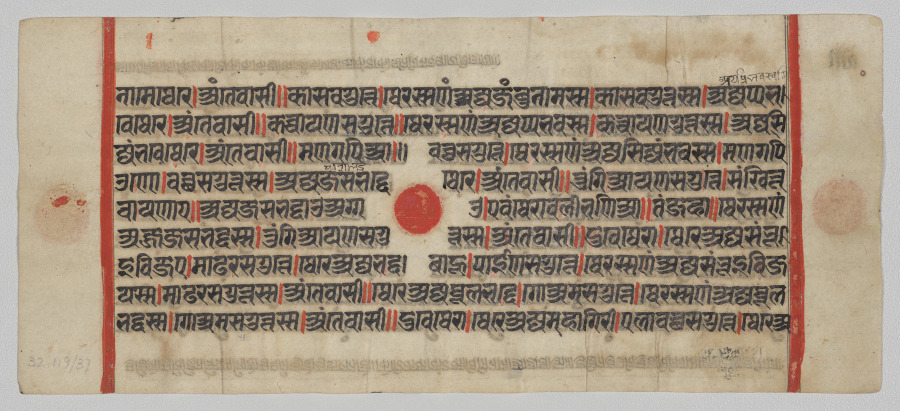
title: Text, Folio 59 (recto), from a Kalpa-sutra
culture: Western India, Gujarat, last quarter of the 15th century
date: c. 1475–1500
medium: Gum tempera, ink, and gold on paper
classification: Painting